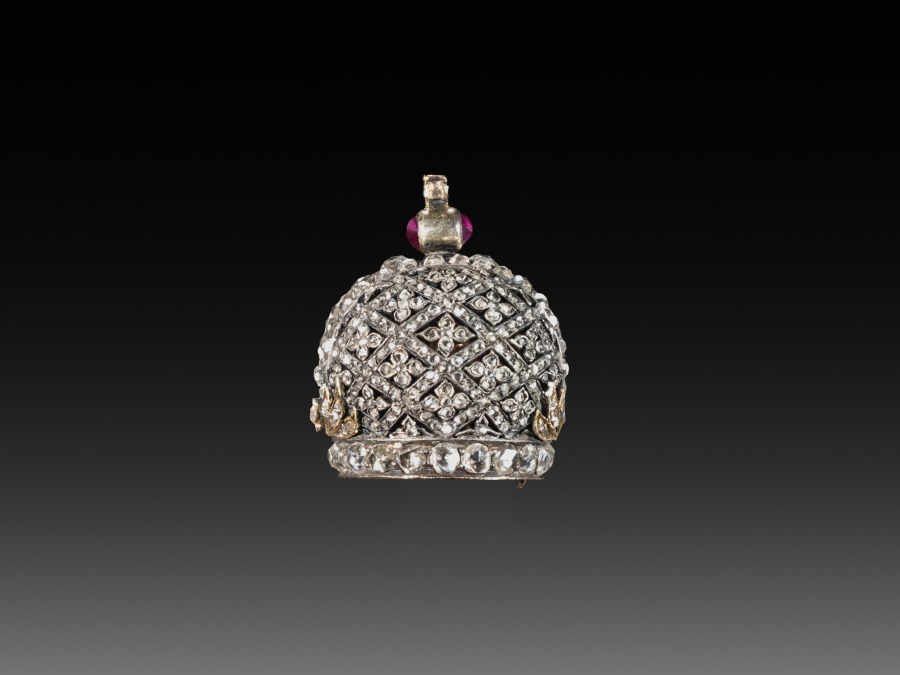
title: Miniature Crown Surprise from the Lapis Lazuli Easter Egg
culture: Russia, St. Petersburg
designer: attributed to Peter Carl Fabergé (Russian, 1846–1920)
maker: attributed to House of Fabergé (Russian, 1842–1918)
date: c. 1885–90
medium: gold, enamel, lapis lazuli, pearls, diamonds, rubies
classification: Miscellaneous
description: This Easter egg, like the subsequent ones produced by Fabergé for the imperial family, contains a surprise when opened. In this case, the egg opens to display a yellow enameled cover, resembling an egg yolk, which then opens to reveal a tiny replica of the Russian imperial crown, containing either a ruby or a pink sapphire suspended on a chain.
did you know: The tiny diamond encrusted crown surprise is a replica of the Russian imperial crown made for Empress Catherine the Great in the 1700s.